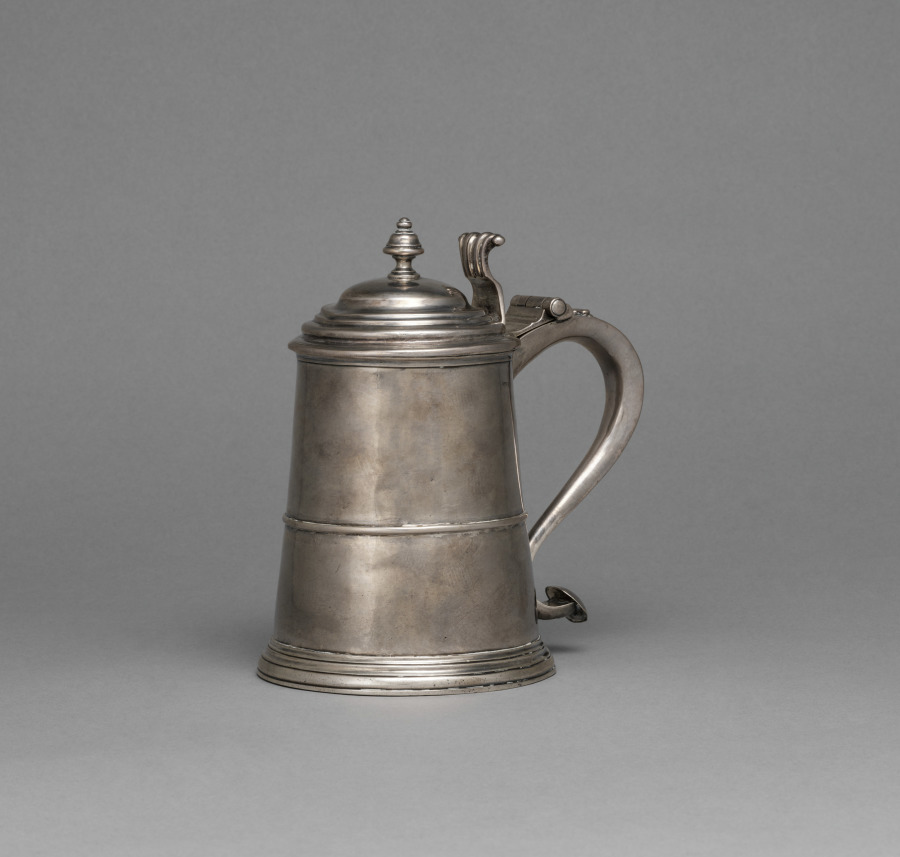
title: Tankard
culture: America, Massachusetts, Plymouth, 18th century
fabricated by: Ephraim Cobb (American, 1708–1775/77)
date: c. 1730–1740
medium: silver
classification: Silver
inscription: engraved "A * L" in block letters on top of handle, and "Anna Leonard" on bottom.